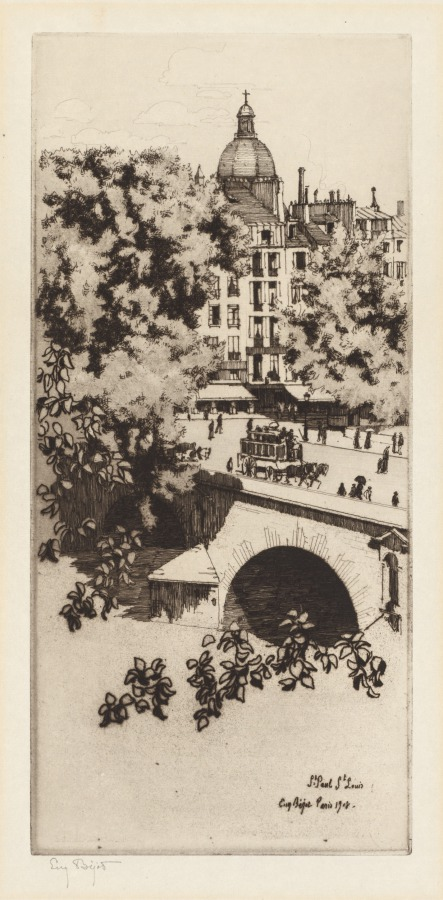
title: Saint-Paul-Saint-Louis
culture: France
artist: Eugène Bejot (French, 1867–1931)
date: 1908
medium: Etching and aquatint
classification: Print